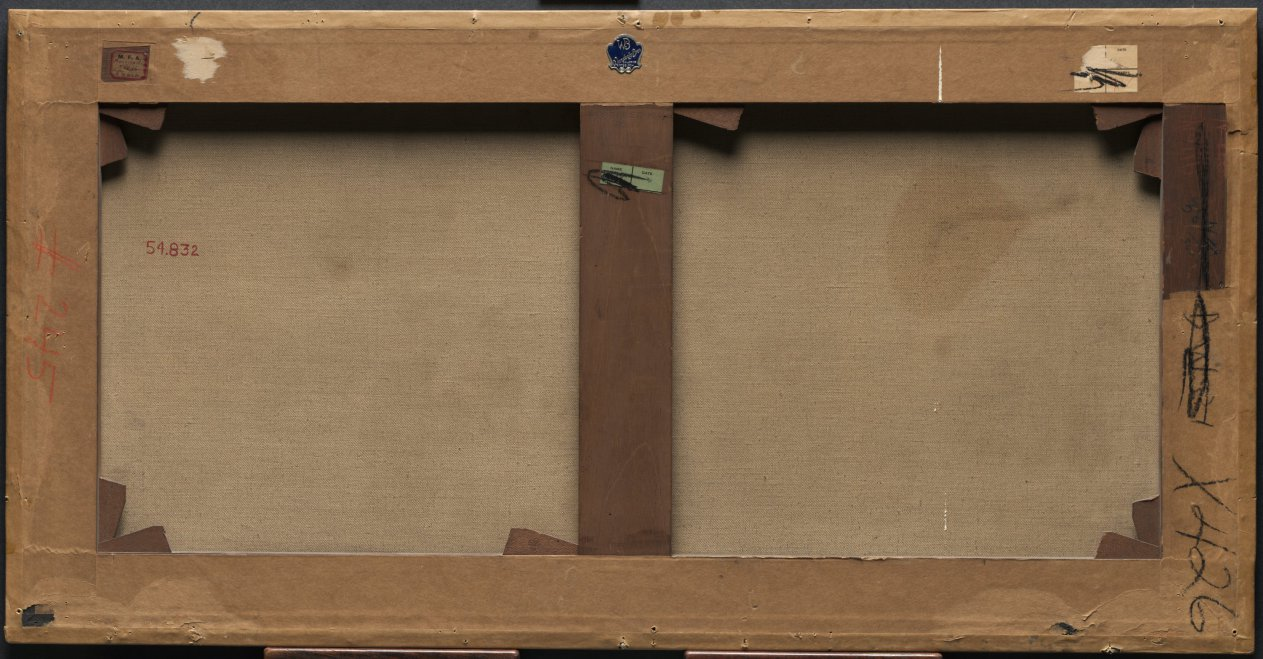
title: A Woodland Fête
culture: France, 19th century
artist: Adolphe Monticelli (French, 1824–1886)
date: c. 1853–1857 or c. 1862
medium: oil on fabric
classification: Painting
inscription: Signed lower right: Monticelli